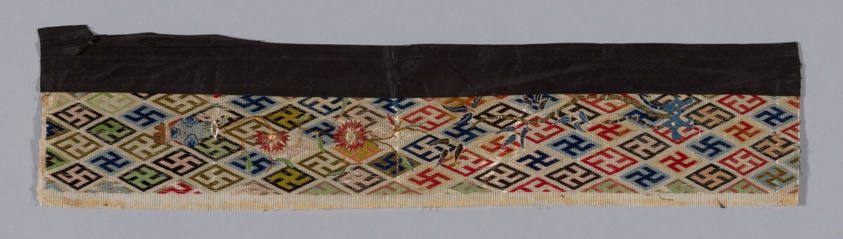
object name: Costume and Accessories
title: Band (from Woman's Trousers or Robe)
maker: China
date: 1875/1900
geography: China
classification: costume - needlework; needlework (visual works); costume